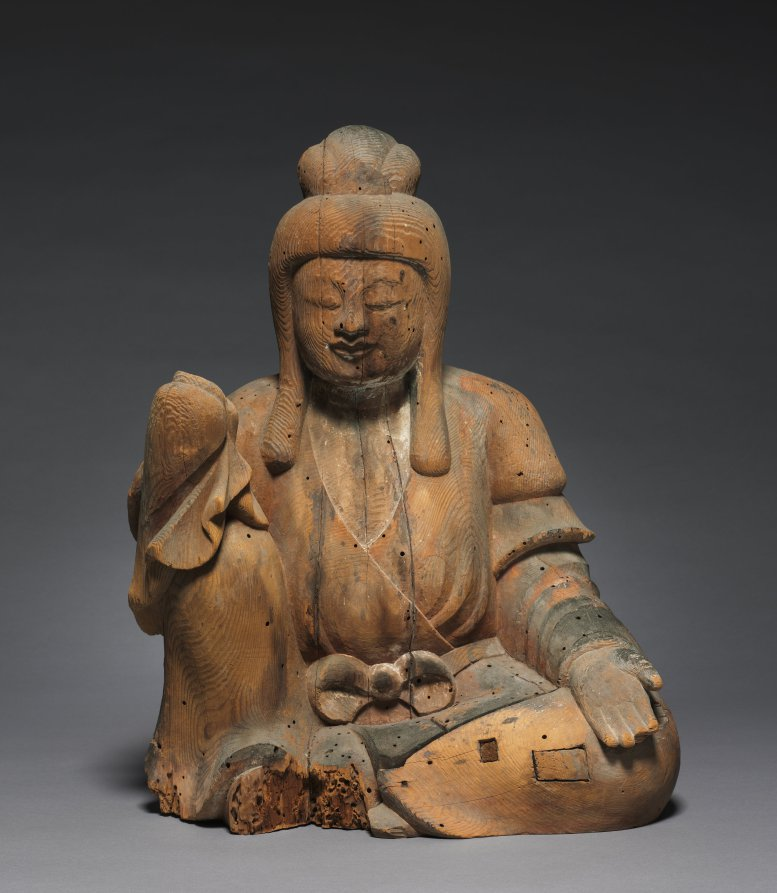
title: Shinto Deity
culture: Japan, Heian period (794–1185)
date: 900s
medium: wood, with traces of polychromy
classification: Sculpture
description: This sculpture represents a kami, the name for deities associated with the Japanese religious tradition called Shinto. It is said to have originally been created for the Usa Hachiman Shrine in Oita on the island of Kyushu. The shrine houses four main kami: Hime Okami, who assists those engaged in agriculture andsea travel; the legendary 5th-century emperor Ojin deified as the kami Hachiman; Empress Jingu; and the kami of Mount Kawara, who aids copper miners. The pose of this figure, dressed in robes reminiscent of a Tang dynasty court lady, suggests that she may have been an attending deity.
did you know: Traces of pigment on the surface of this sculpture indicate it was once painted.